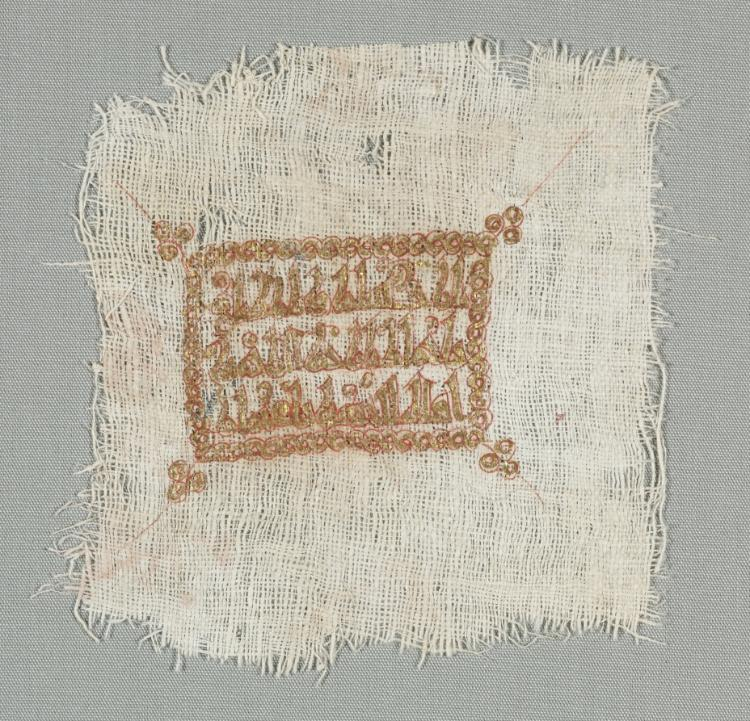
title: Fragment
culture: Iran or Iraq, Eastern Caliphate, 11th-12th century, Seljuk period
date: 1000s - 1100s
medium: painting on polished tabby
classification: Textile